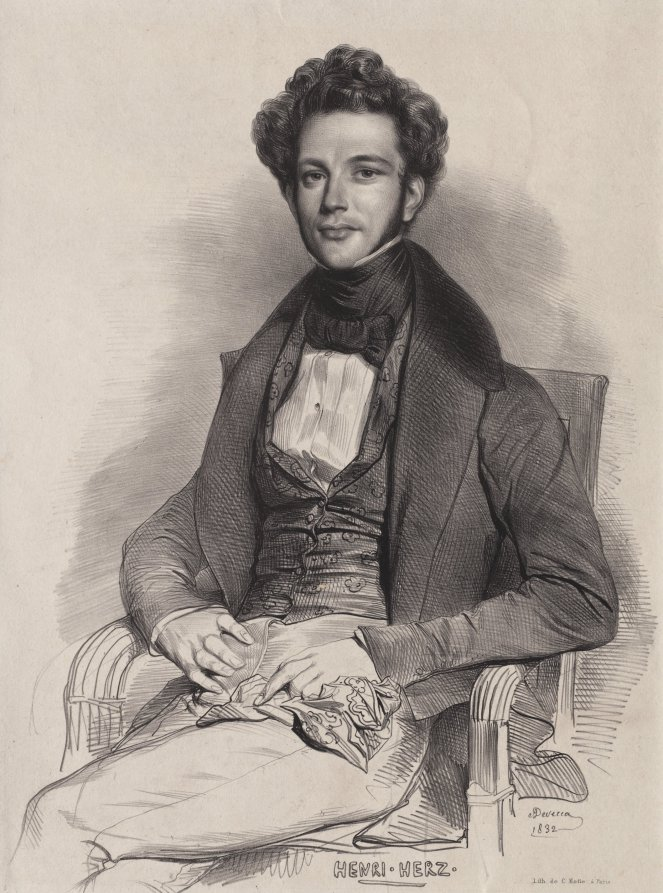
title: Henri Herz, Pianist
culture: France, 19th century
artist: Achille Devéria (French, 1800–1857)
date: 1832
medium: lithograph on chine collé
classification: Print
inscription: signed and dated in the stone, lower right: Deveria 1832